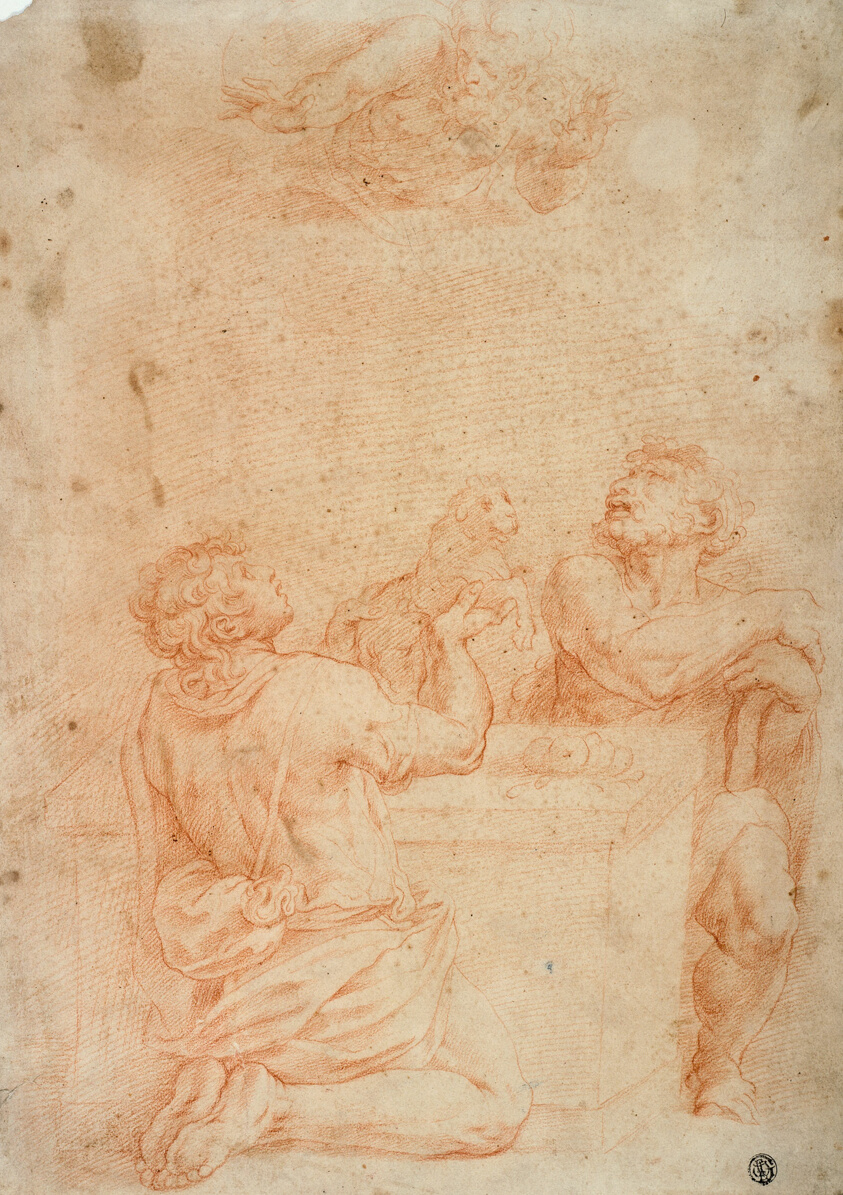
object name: Drawing and Watercolor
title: Sacrifice of Cain and Abel, with God the Father Above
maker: Attributed to Giorgio Vasari; Italian, 1511-1574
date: 1554/55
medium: Red chalk on tan laid paper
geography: Italy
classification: chalk; drawings (visual works); prints and drawing